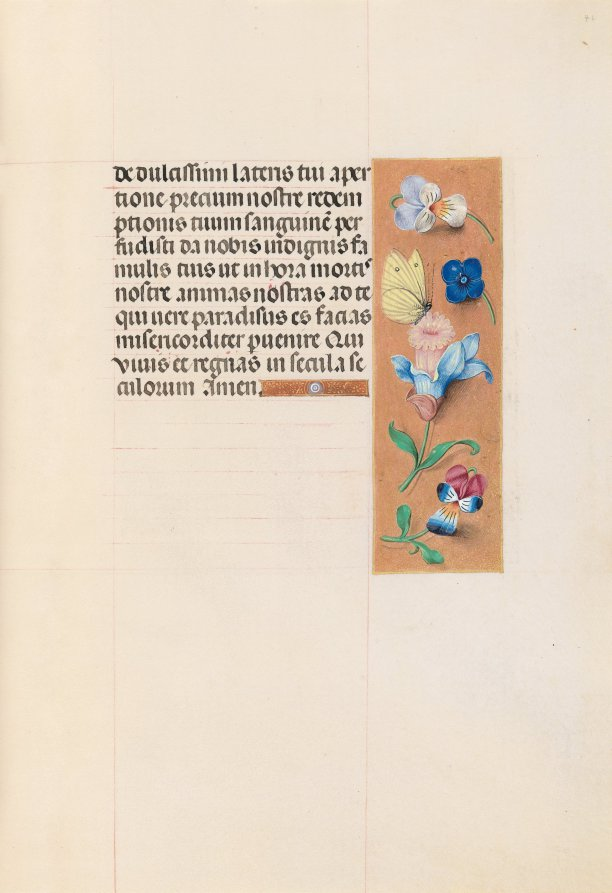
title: Hours of Queen Isabella the Catholic, Queen of Spain: Fol. 71r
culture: Flanders, Ghent and Bruges, late 15th century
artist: Master of the First Prayerbook of Maximillian (Flemish, c. 1444–1519)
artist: and Associates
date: c. 1500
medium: ink, tempera, and gold on vellum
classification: Bound Volume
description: This manuscript was illuminated by a circle of at least five highly organized manuscript painters active in the Flemish cities of Ghent and Bruges. The principal illuminator was Alexander Bening, who painted the majority of the book's miniatures. Manuscripts produced by this circle of artists are renowned for the decoration of their borders, which typically feature a rich variety of realistically-painted flowers, birds, and butterflies. This prayer book, called a book of hours, was intended not for a cleric, but for the private devotions of a lay person-in this case, Isabella the Catholic, Queen of Spain (1451-1504). Isabella's coat of arms embellishes the book's frontispiece. It is unlikely that the book was commissioned by the Queen herself; rather, she probably received it as a diplomatic gift from someone courting her patronage, perhaps Cardinal Francisco Jimenez de Cisneros. A Franciscan friar, Jimenez was dependent upon Isabella for his advancement, first to the post of Queen's confessor in 1492, and then to Archbishop of Toledo in 1495.